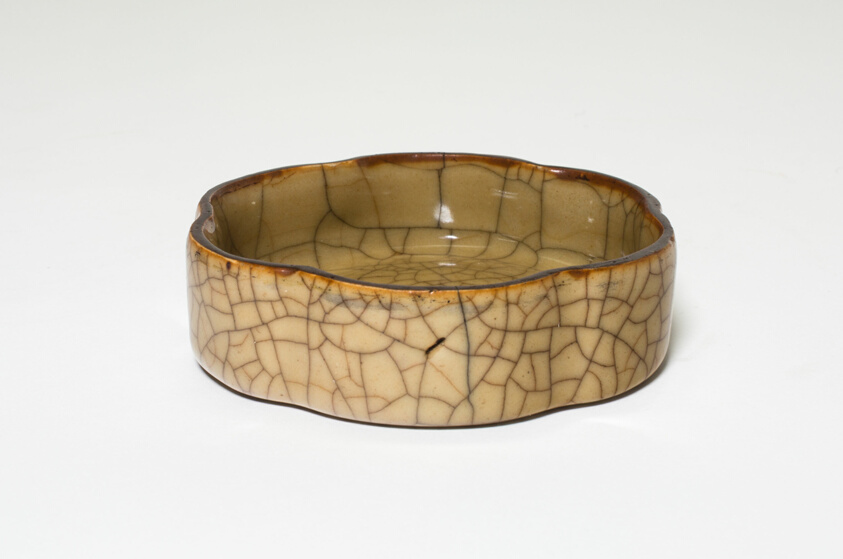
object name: Vessel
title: Lobed Dish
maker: China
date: Song dynasty (960–1279)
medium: Ge ware; stoneware with crackled tan glaze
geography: China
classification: ceramics; asian art